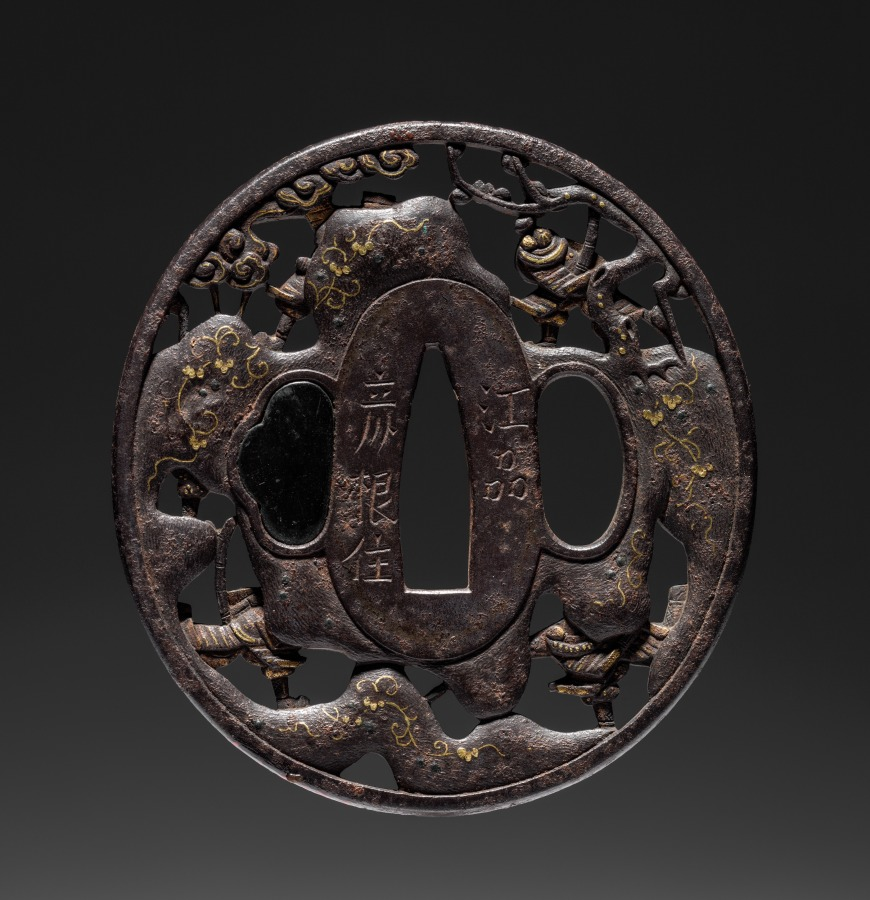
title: Sword Guard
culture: Japan, Edo period (1615–1868)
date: 1600s-1700s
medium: bronze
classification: Arms and Armor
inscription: signed: SOHEISHI: i.e. KITAGAWA SOTEN, founder of the SOTEN School.